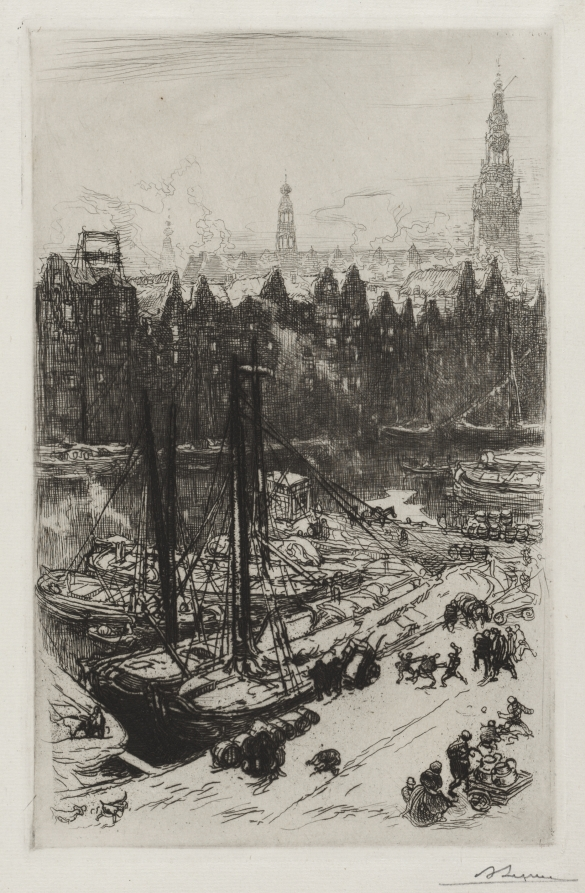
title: Amsterdam, vue de Victoria Hotel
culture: France, 19th-20th century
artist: Auguste Louis Lepère (French, 1849–1918)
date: 1901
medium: etching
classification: Print